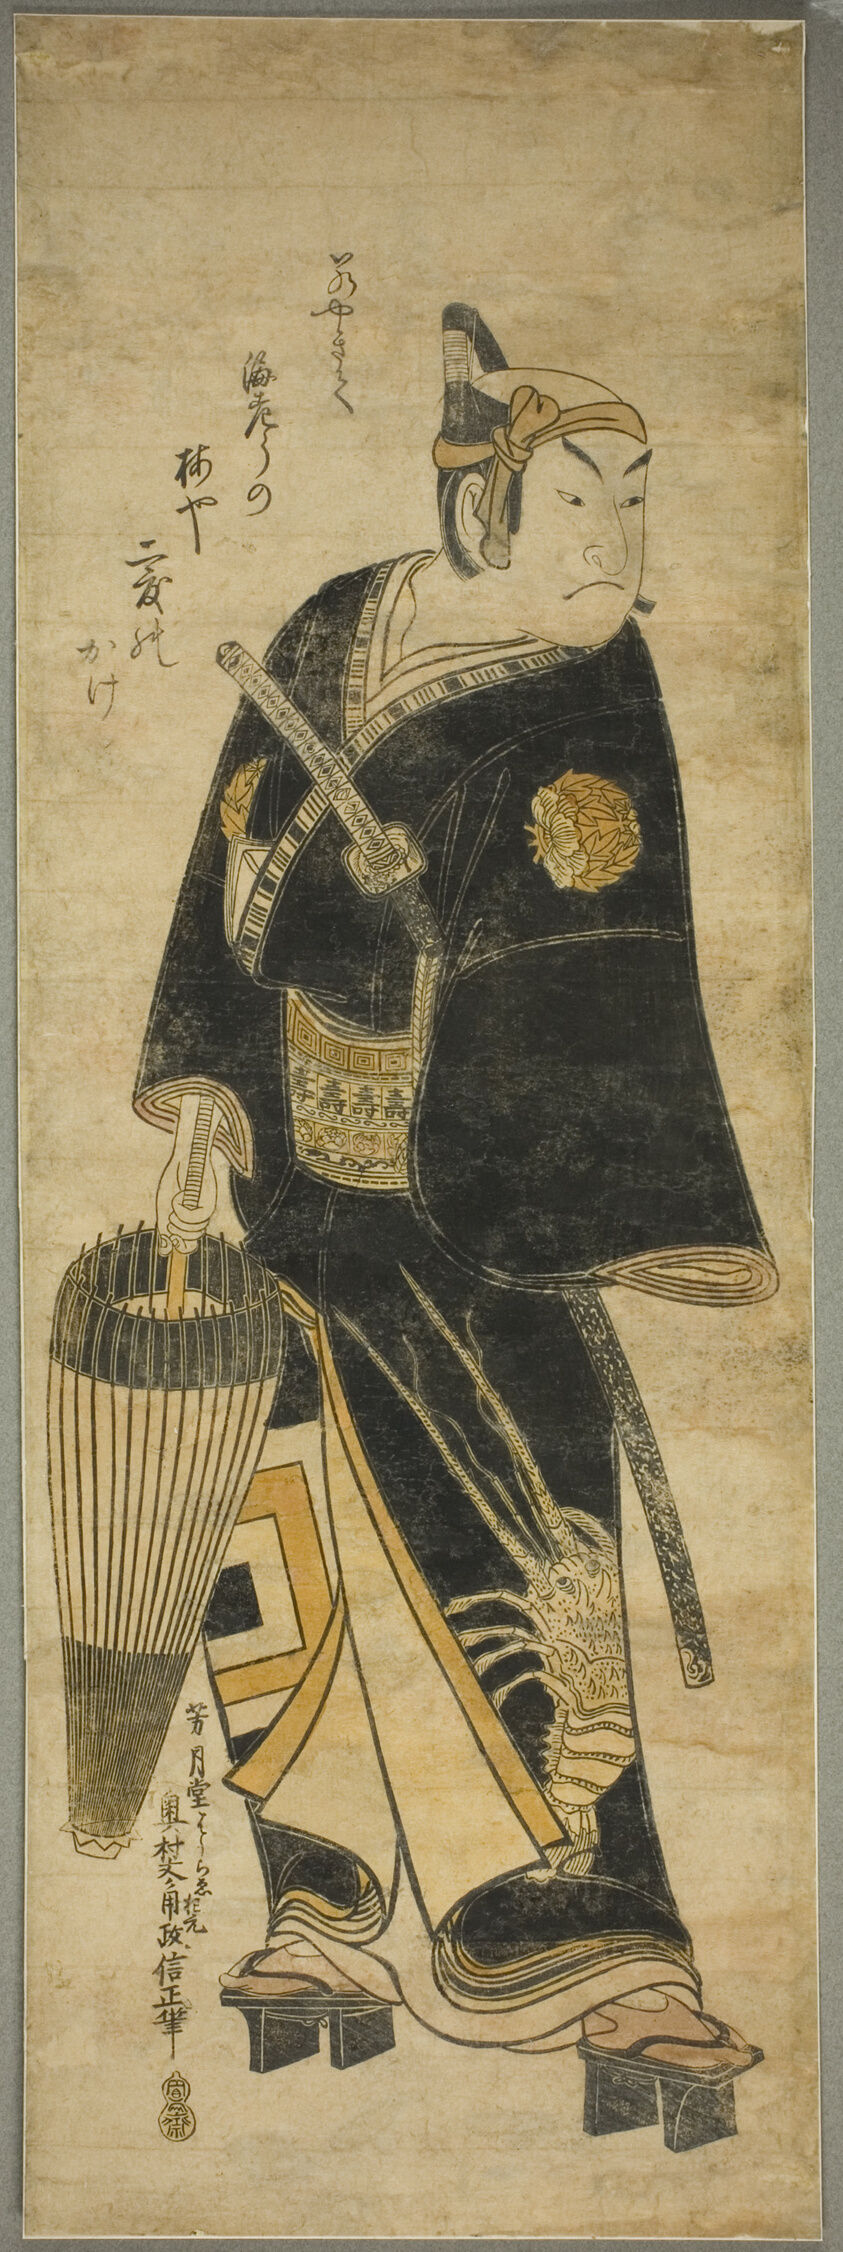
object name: Print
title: The Actor Ichikawa Ebizo I as Sukeroku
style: Japanese (culture or style)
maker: Okumura Masanobu (Japanese, 1686-1764)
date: c. 1749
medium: Hand-colored woodblock print; vertical oban diptych, urushi-e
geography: Japan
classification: woodblock print; print; asian art